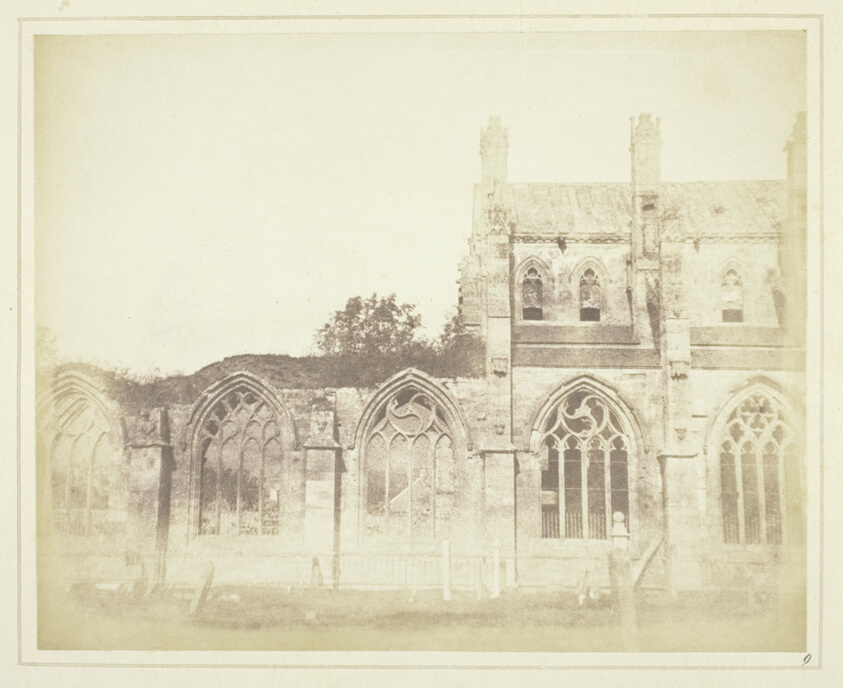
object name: Photograph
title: Melrose Abbey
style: 19th century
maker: William Henry Fox Talbot (English, 1800–1877)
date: 1844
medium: Salted paper print, plate IX from the album "Sun Pictures in Scotland" (1845)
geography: England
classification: salted paper print; photographic process; photography; photograph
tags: Collected by Hugh Edwards